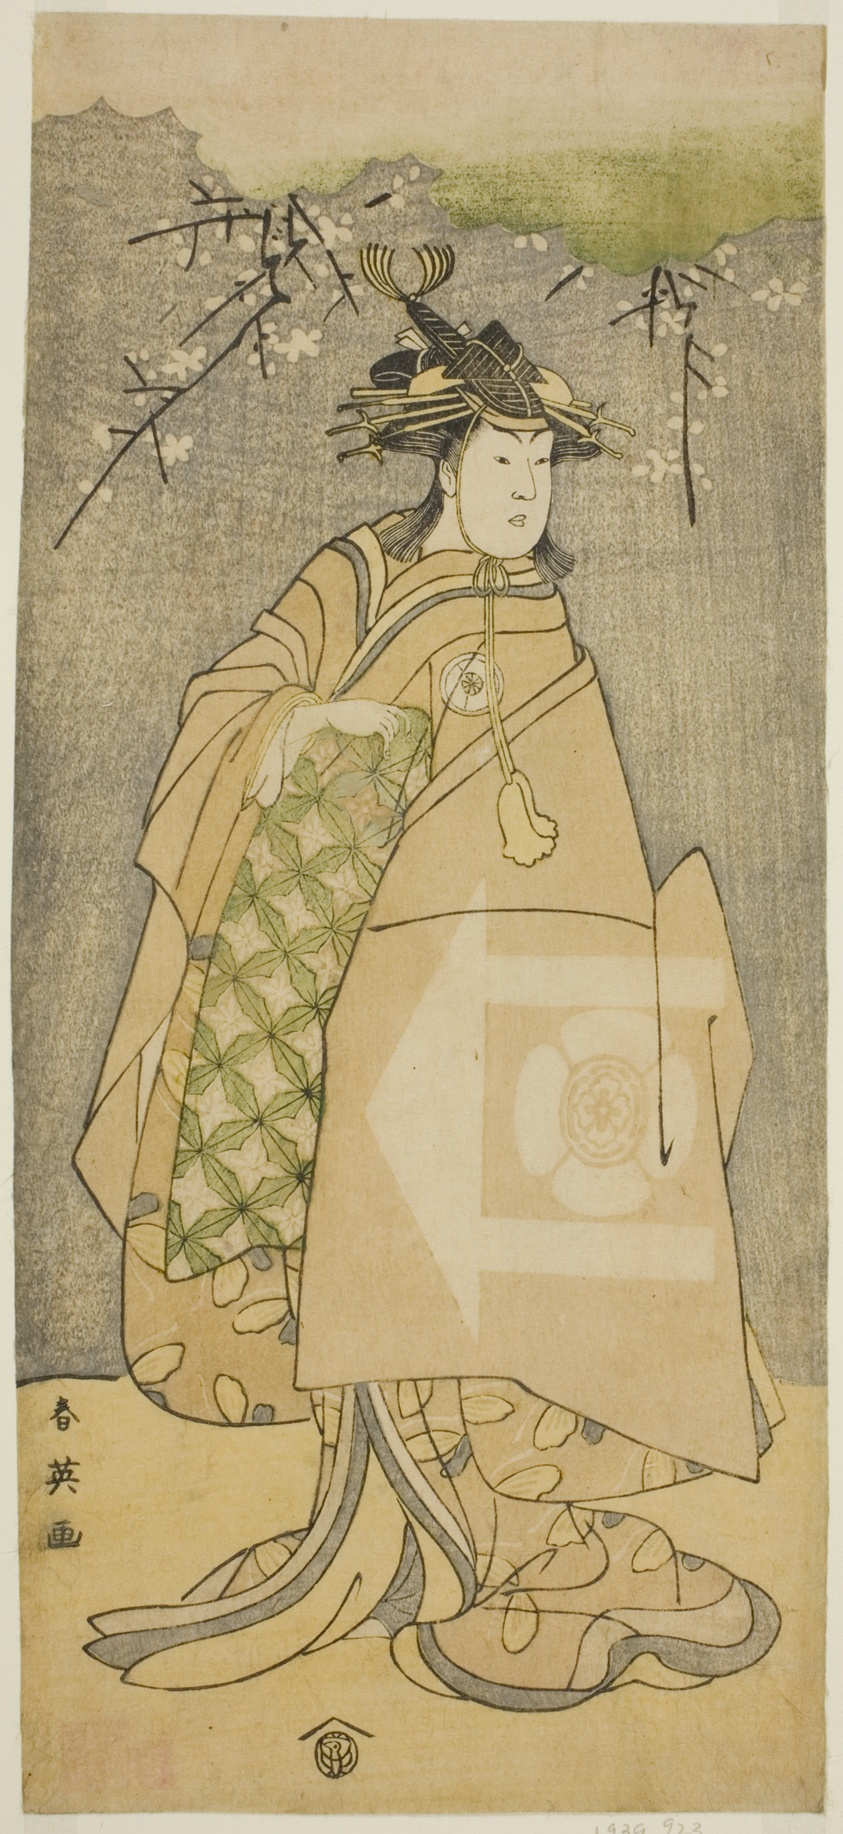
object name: Print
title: The Actor Iwai Kiyotaro as Kewaizaka no Shosho in the Play Gohiiki no Hana Aikyo Soga, Performed at the Kawarazaki Theater in the First Month, 1794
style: Japanese (culture or style)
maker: Katsukawa Shun'ei (Japanese, 1762-1819)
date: c. 1794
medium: Color woodblock print; hosoban; left sheet of diptych (right: 1925.2506)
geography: Japan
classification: woodblock print; print; asian art